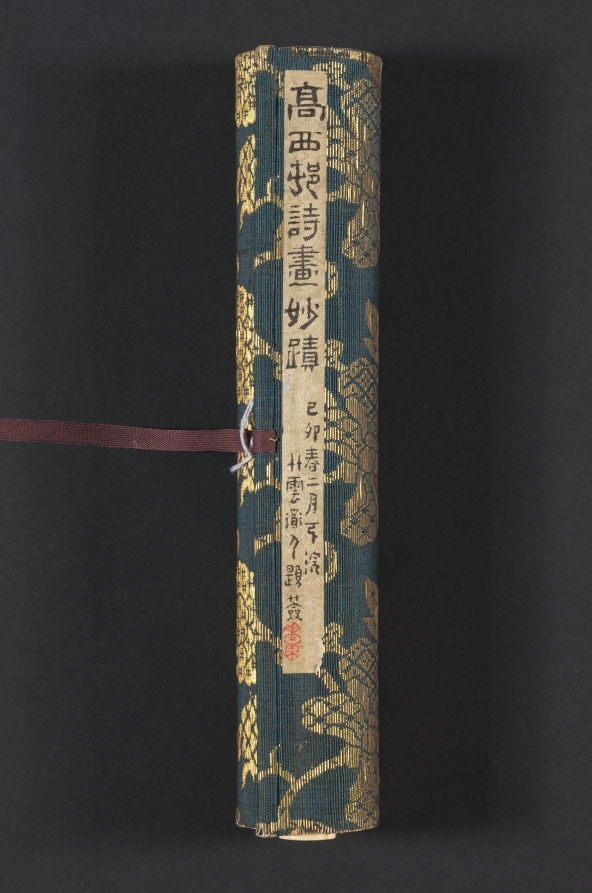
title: Plum Blossoms and Peonies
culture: China, Qing dynasty (1644-1911)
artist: Gao Fenghan (Chinese, 1683–1749)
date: 1741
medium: handscroll, ink on paper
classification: Painting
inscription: Artist's 2 inscriptions and 9 seals (the painting of Peonies with the artist's colophon and the colophon by Hou Chia-fan are on a single sheet of paper). Artist's inscription and 2 seals (Plum Blossoms): [seal] Ts'ai-yün. After finishing writing my colophon, I unrolled the painting to take another look, and it now seems that the composition here should have moved to the later part of the scroll. If that is the case, then the "Cool Beauty" [prunus] of the Solitary Hill is after all unable to take precedence over the "King of Flowers" [peony]. A laugh. Lao-fou inscribed. [seal] Feng-han. Artist's colophon (Plum Blossoms): [3 seals] Tun; Yen-yün-kung-yang, Hou-shang-tso-sheng. A few days after I painted this scroll for Shui- hsien [Yüeh Meng-yüan], the plum blossoms were in full bloom at his residence. He invited me over to enjoy them together for a long while, and I composed two additional poems and wrote them down here for his criticism. [Poems on the colophon are not translated.] First month, twenty-first day, your junior, Kao Feng-han of Nan-fou drafted this with the left hand. [seal] Feng-han. Artist's inscription and 4 seals (Peonies): Brushed with the left hand in the hsin-yu year [1741]. [seal] Yu-hsi. [3 seals at end of painting] Hou-shang-tso-sheng; Yen-yün-kung-yang; Shih-tsao-wu. Artist's colophon and seal (Peonies): The imperial concubine from the Yang family loved to dress in red, And from the emperor won the title of Hai-t'ang. But ever since she became the new dream of the moon palace, She changed into rainbow colors, while learning to dance. After I wrote the poem on Looking for Plum Blossoms in the Teng-wei Mountains, I attached to it a few branches of prunus, some bamboo tips and a piece of rock, with a scattering of green [moss] here and there to fill up the scroll. Unexpectedly, my playful fascination [with these subjects] was still not quite satisfied, so I made up these amorous ideas and romantic images [of the peony], to follow the footsteps of the fair lady of the Ku-hsieh Mountain [prunus]. Furthermore, I picked out one poem to be my vanguard. Perhaps such luminosity of wealth and power will be enough to overwhelm the poor fellows, and [they] will not mind the comparatively short length [of paper] assigned to it. Amusingly inscribed. Please correct me again. To Shui-hsien, my learned senior, your junior Han inscribed again. [seal] Tso-hua [left-handed painting]. 1 additional colophon and 5 additional seals: 1 colophon, dated 1742, and 3 seals of Hou Chia-fan (act. ca. 1742); 1 seal of P'u Ch'üan (20th c.?); 1 seal of Li family (dates unknown).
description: One of the so-called Yangzhou Eccentrics (a group of painters who lived in Yangzhou and were known for their unorthodox art and lifestyle), Gao Fenghan depicts China’s two most loved flowers in full bloom—the “cold beauty,” or plum blossom, in the first section, and the “king of flowers,” or peony, in the second section. Painted in 1741, the year when Gao decided to leave the south and return home to Shandong province in eastern China, this work was likely a token of farewell. His casual brushwork may indicate his mental and physical struggle at the time. After having crippled his right hand in 1737, Gao used his left hand to paint and achieved a crudeness and eccentric style unattainable before.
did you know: In East Asian art, peonies traditionally symbolize prosperity and wealth.